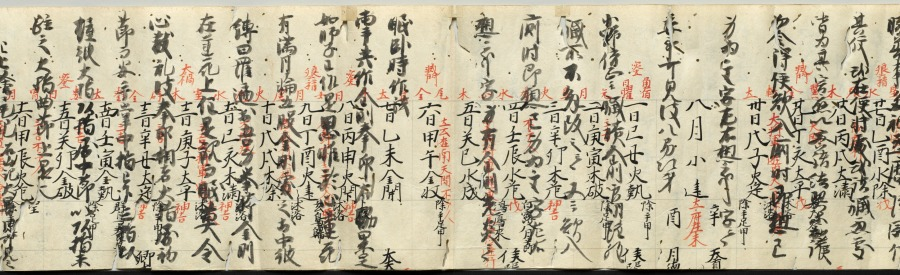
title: Scroll of Miscellaneous Notes written on a Calendar by Priest Seigen (verso)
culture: Japan, Kamakura period (1185–1333)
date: c. 1200–1231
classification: Manuscript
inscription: bears miscellaneous notes written by Priest Seigen.